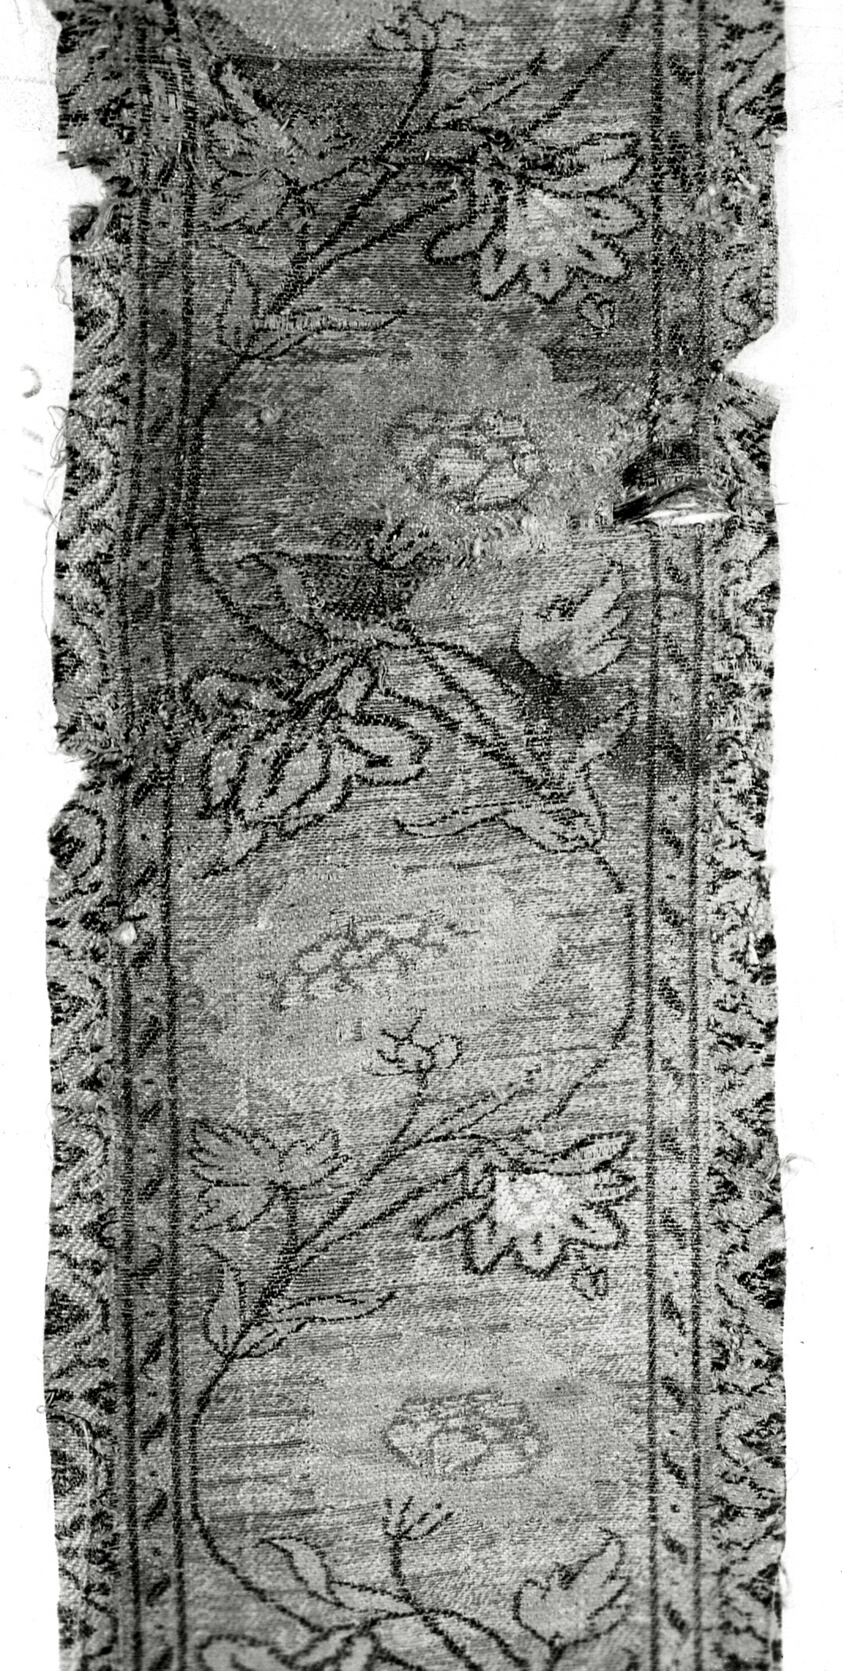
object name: Textile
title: Fragment (Border)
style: isfahan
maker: Iran (Persia, Isfahan)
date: 18th century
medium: Brocaded compound cloth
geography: Iran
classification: textile; weaving